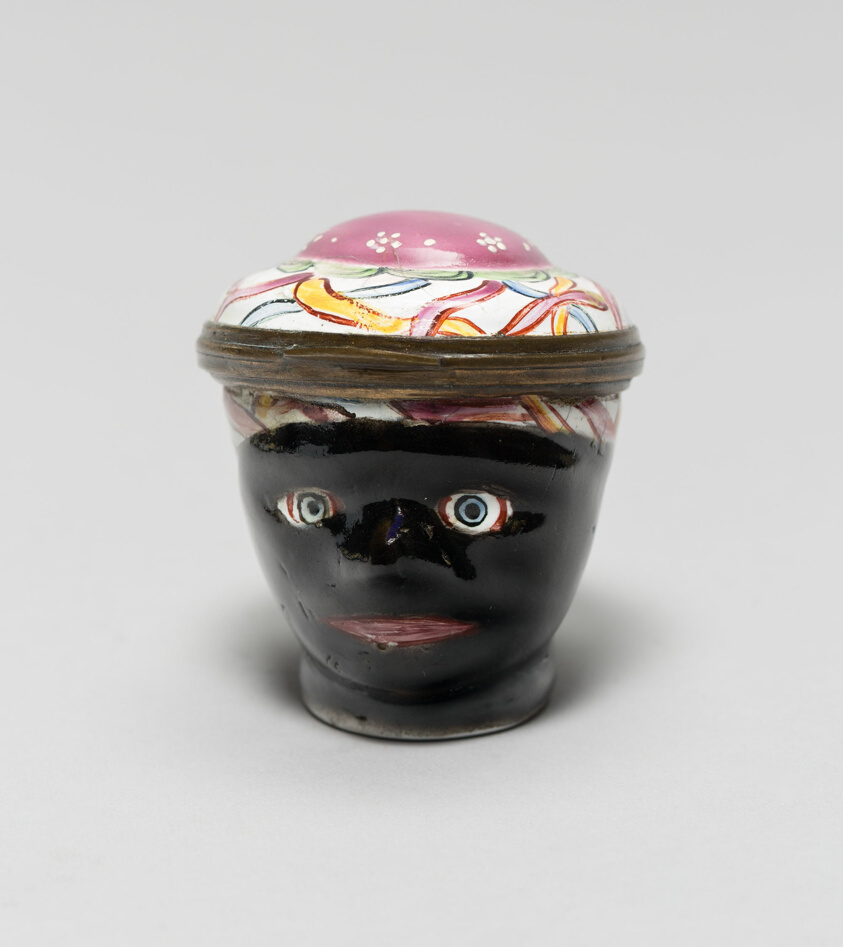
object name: Metalwork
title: Box: Head of an African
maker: Probably Battersea, England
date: c. 1750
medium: Polychrome enamel on copper with metal mounts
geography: England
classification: enamel; metalwork